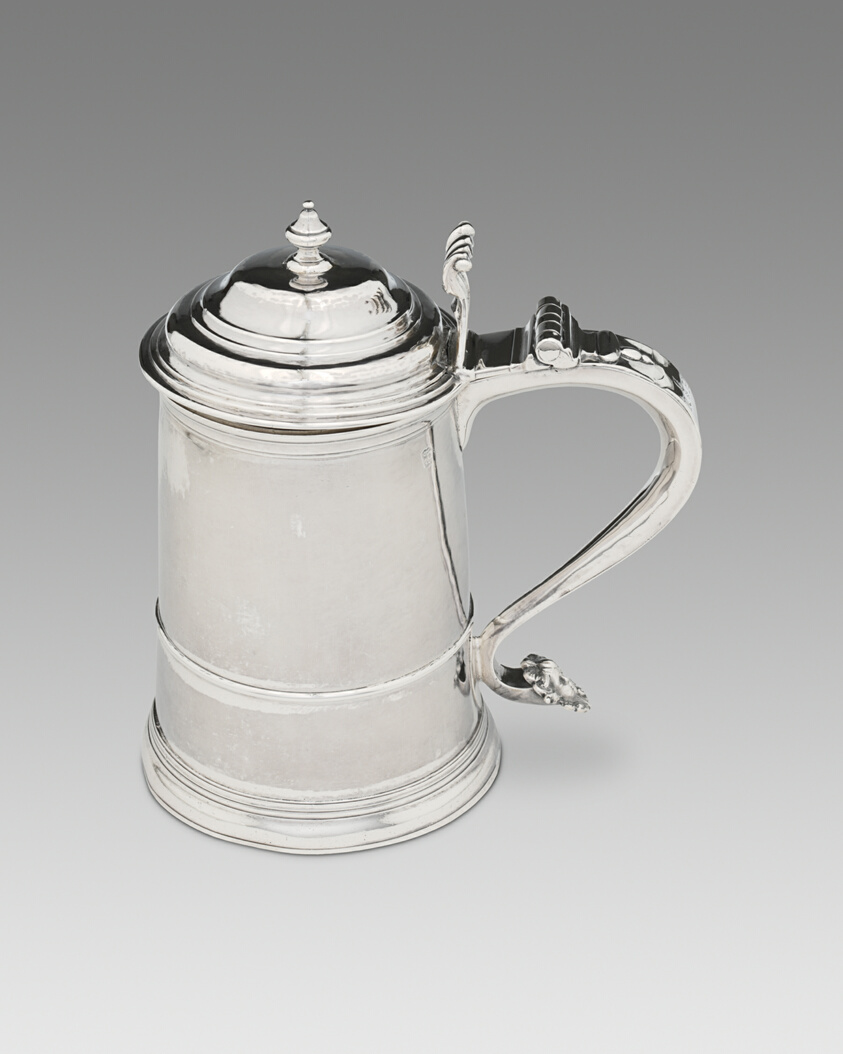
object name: Metalwork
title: Tankard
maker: John Coney; American, 1655–1722; Boston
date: 1705–22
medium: Silver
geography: Boston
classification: drinking vessel; silver; american decorative arts; american arts; decorative arts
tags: dining, drinking